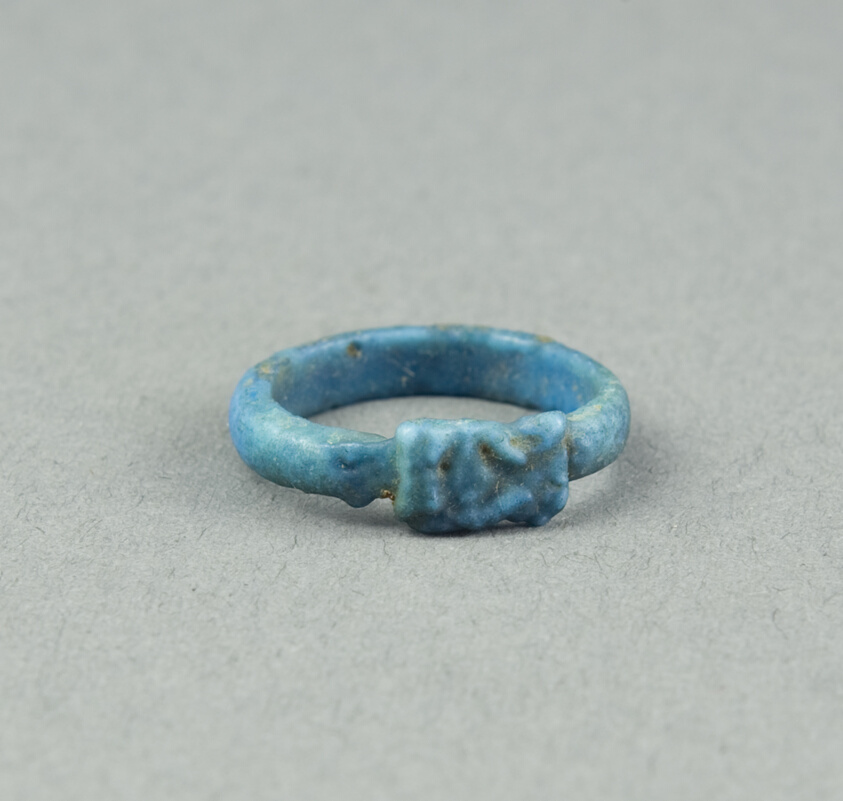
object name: Costume and Accessories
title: Ring: Head of Hathor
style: egyptian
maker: Egyptian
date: New Kingdom, Dynasty 18 (about 1390 BCE)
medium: Faience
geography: Egypt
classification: ring (jewelry); ceramics; jewelry; ancient art; costume; faïence (composite material)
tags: goddesses